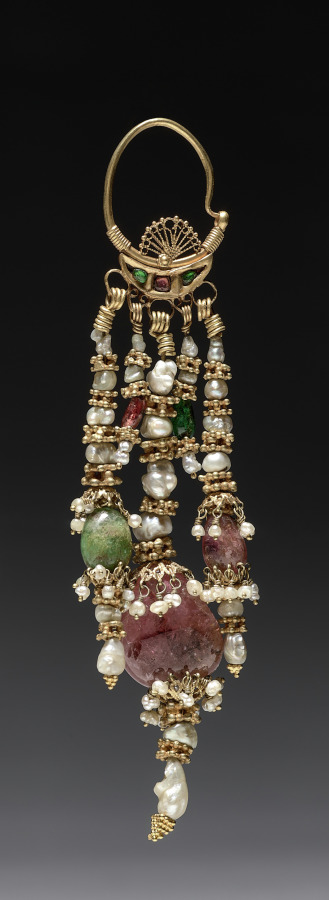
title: Earring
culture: Uzbekistan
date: 1700s–1800s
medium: silver gilt with pearls, gold beads and crystal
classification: Jewelry